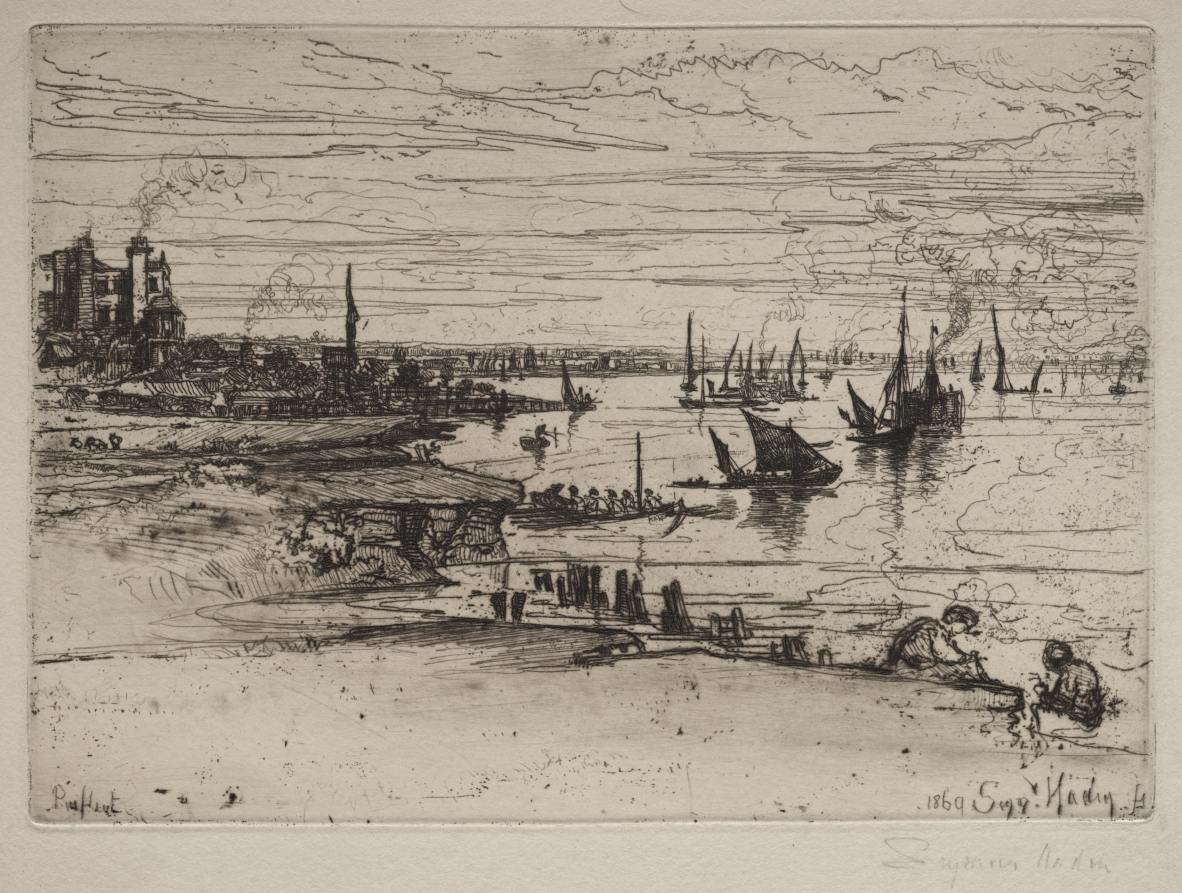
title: The Inn, Purfleet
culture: England, 19th century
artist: Francis Seymour Haden (British, 1818–1910)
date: 1869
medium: etching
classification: Print